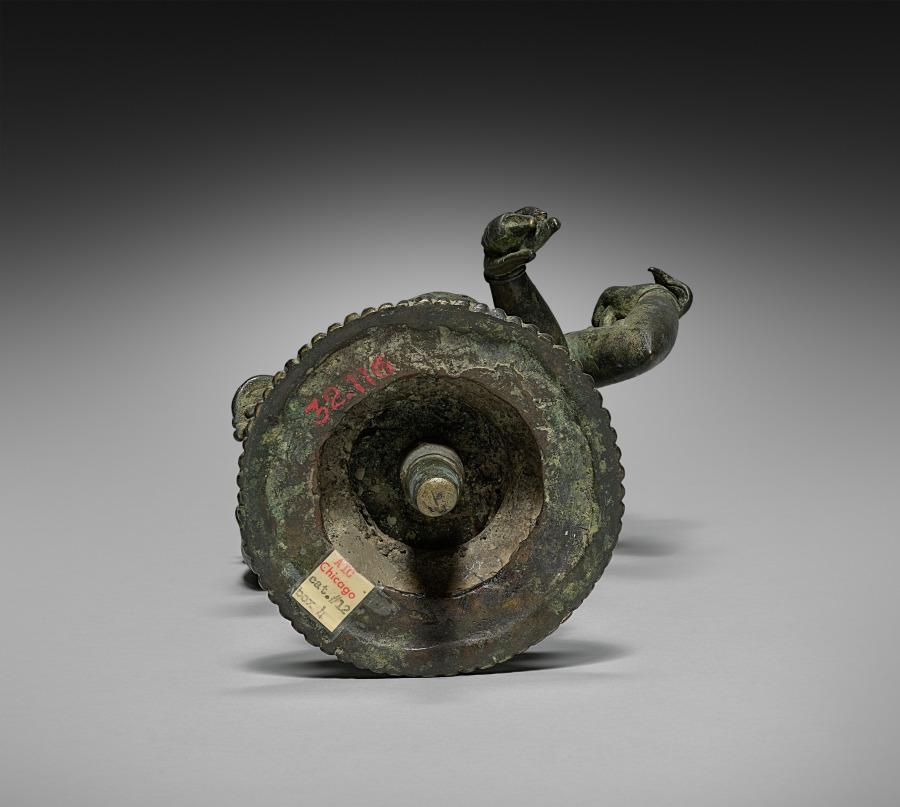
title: Vasudeva - Vishnu - Narayana as Shridhara, one of the 24 forms of Vishnu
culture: West India, 16th-17th century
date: 1500s–1600s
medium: brass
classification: Sculpture